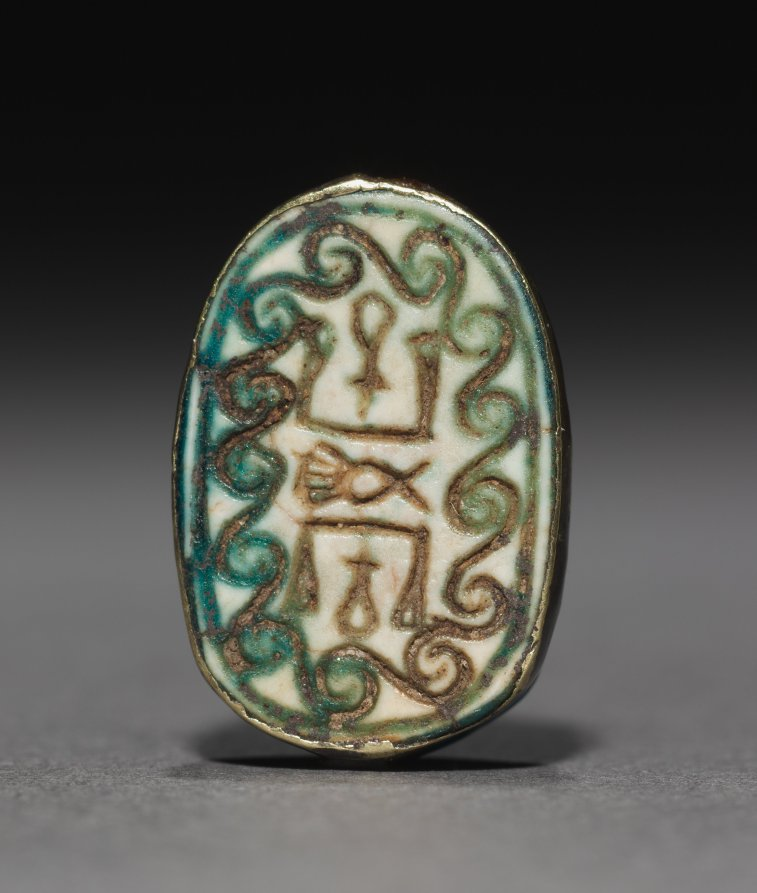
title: Scarab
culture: Egypt, Middle Kingdom (2040–1648 BCE), Dynasties 12–13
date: 1980–1648 BCE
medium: blue-green glazed steatite, gold mount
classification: Scarabs